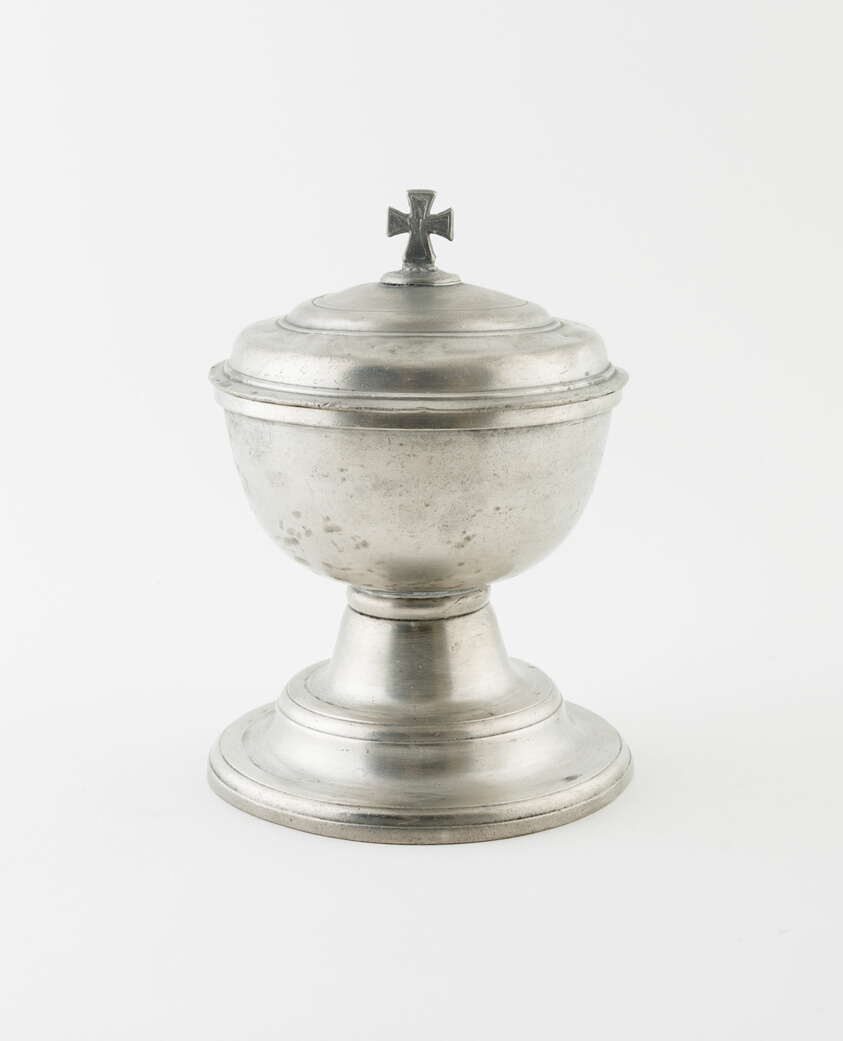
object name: Metalwork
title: Ciborium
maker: S.T., possibly Sigmund Tzschirschwitz; German, active mid-18th century; Fraustadt, Germany (now Poland, Wschowa)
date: c. 1750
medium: Pewter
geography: Germany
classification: pewter; metalwork; european decorative arts